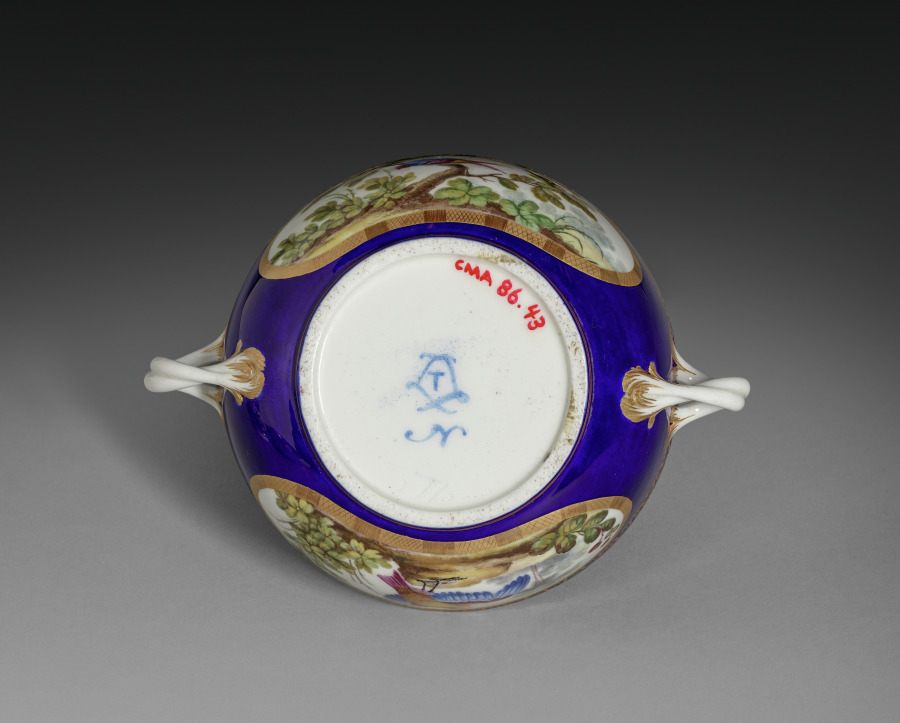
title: Broth Bowl (Écuelle Ronde)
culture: France, Sèvres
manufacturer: Sèvres Porcelain Factory (French, est. 1756)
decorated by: François-Joseph Aloncle (French)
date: 1772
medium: soft-paste porcelain with enamel and gilt decoration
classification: Ceramic